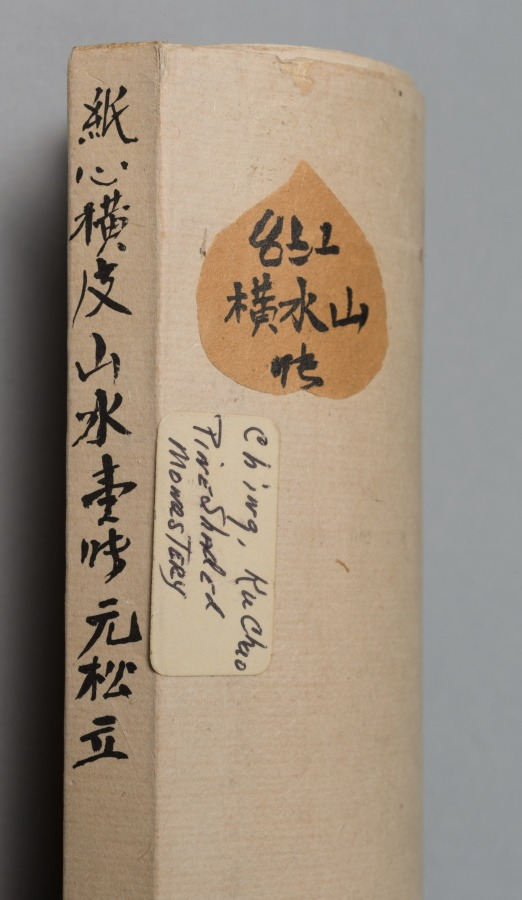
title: Pine-shaded Monastery on a Cloudy Mountain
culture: China, Qing dynasty (1644-1911)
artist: Gu Chao (Chinese, active late 1700s)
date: late 1700s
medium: handscroll, ink and slight color on paper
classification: Painting